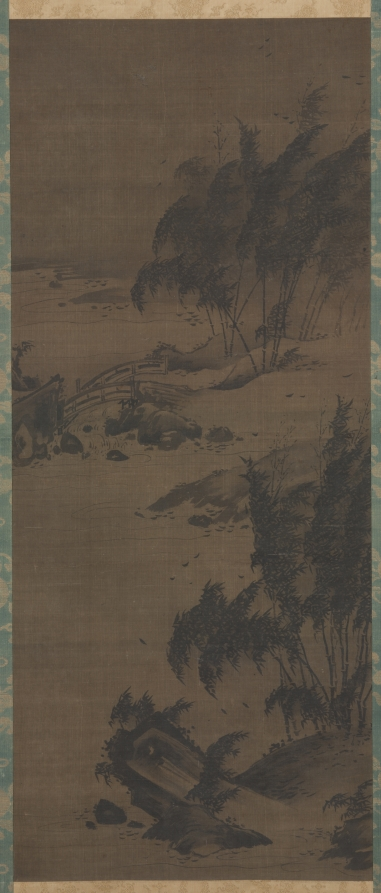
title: Bamboo in Rain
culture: Japan, Muromachi period (1392–1573)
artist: attributed to Genga (Japanese)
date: early 1500s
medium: hanging scroll; ink on silk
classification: Painting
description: East Asian paintings from China, Korea, and Japan were frequently conceived as sets of multiple images. These sets might have been composed for specific palace or temple rooms, or to portray a specific theme, such as the four seasons. Over time, the original intent of such sets is often lost through damage, changes in ownership, or a variety of other reasons. The identity of the artist can also be lost, but then, sometimes, retrieved. This pair of ink paintings has traditionally been labeled as Japanese and attributed to the 16th-century painter Genga. Since there are no seals or signature of the artist on the painting, this attribution was based on comparisons of brush style with paintings known to be by Genga. More recent study indicates that while the 16th century is an appropriate time frame for the pair, the precise cultural identity of the artist is not certain after all. The dark, eccentric shapes of the rocks and bamboo clusters and the dramatic tonal contrasts evident throughout the composition point to either Korean authorship or influence upon a Japanese painter of the period.